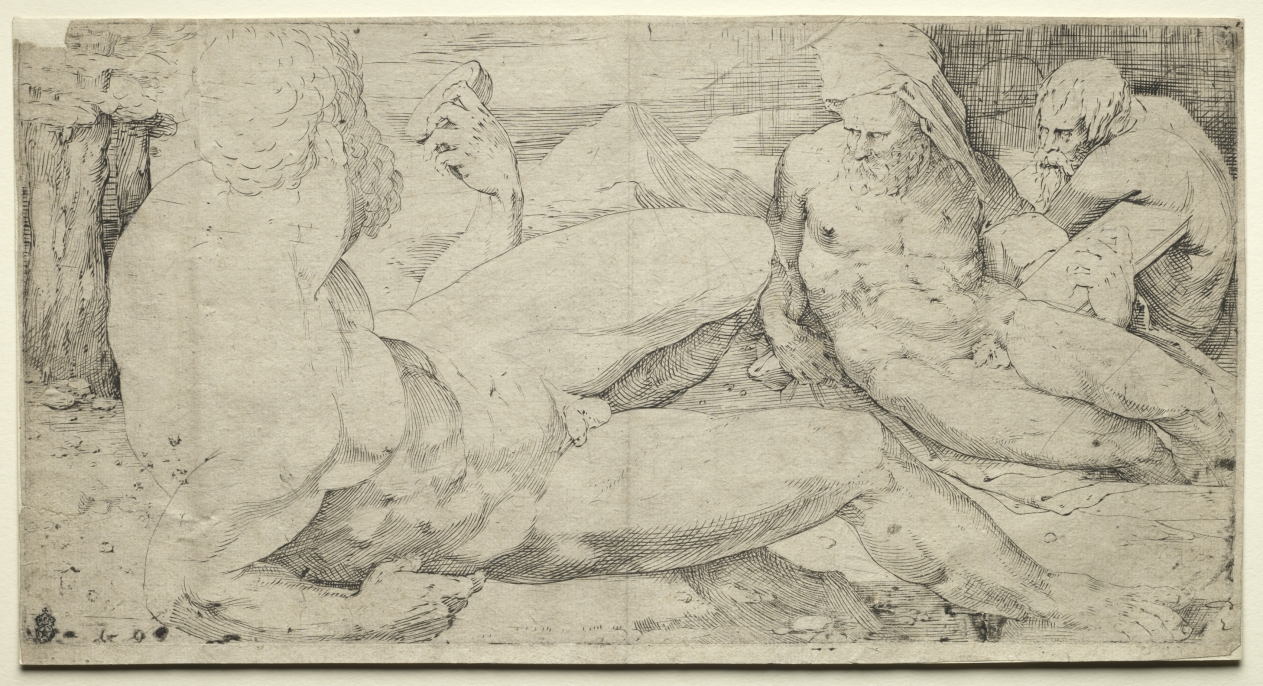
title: Three Male Nudes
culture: Italy, Siena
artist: Domenico Beccafumi (Italian, 1486–1551)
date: 1525–50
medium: engraving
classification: Print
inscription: lower right, pen and brown ink: [two illegible marks]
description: Domenico Beccafumi was a Mannerist painter and sculptor who completed several religious and civic commissions in his home town of Siena. An experimental printmaker, Beccafumi made a chiaroscuro print, mixing engraving and woodcut on the same sheet. This print is a rare impression of the engraved plate alone.